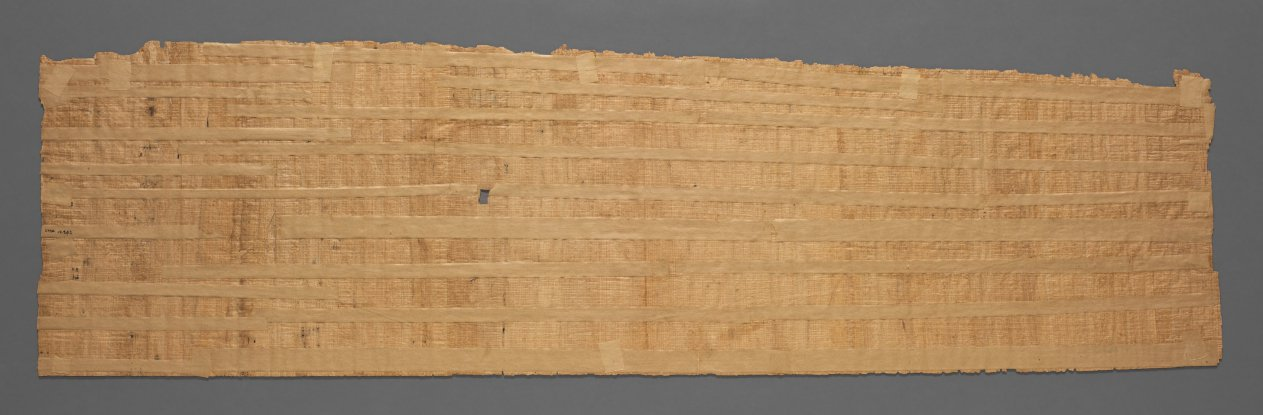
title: Book of the Dead of Bakenmut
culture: Egypt, Third Intermediate (1069–715 BCE), Dynasties 21–22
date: 1000–900 BCE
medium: papyrus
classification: Funerary Equipment